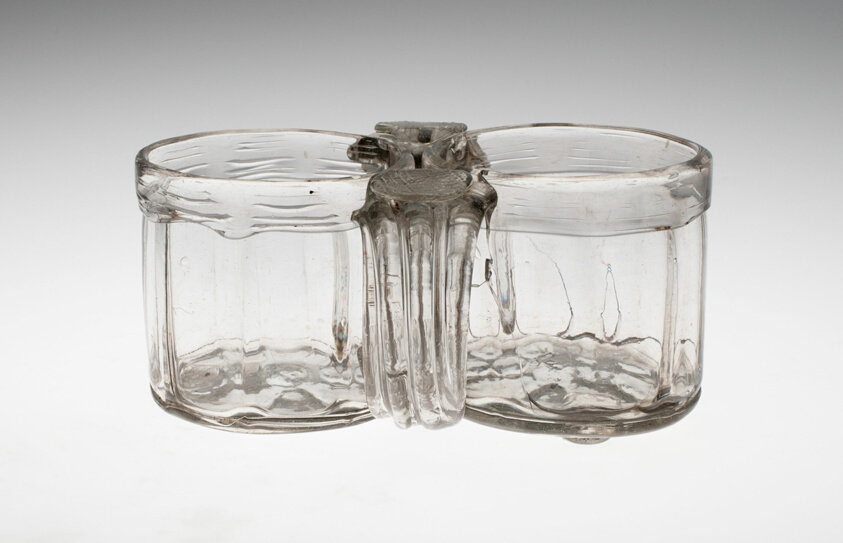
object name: Glass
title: Cruet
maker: Possibly France, Normandie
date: Mid 18th century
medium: Glass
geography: France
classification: glass; european decorative arts